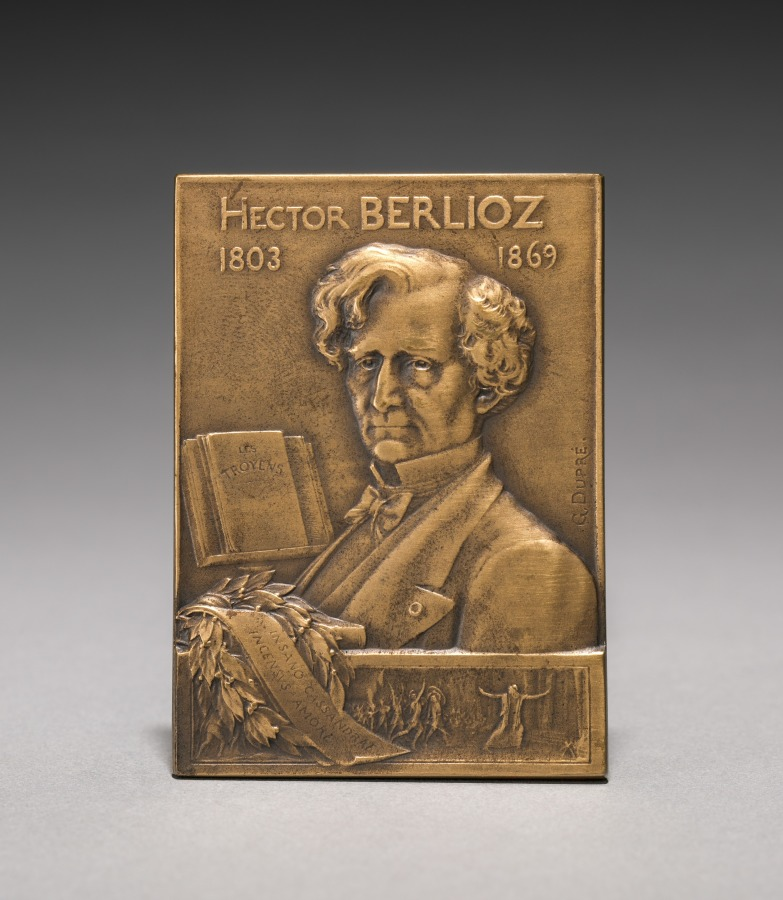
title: Medallion (obverse)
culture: France, early 20th century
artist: Jules Dupré (French, 1811–1889)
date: 1903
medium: bronze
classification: Metalwork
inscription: "Grenoble et la côte-saint-andré à Hector Berlioz"; signed: "G. Dupré."